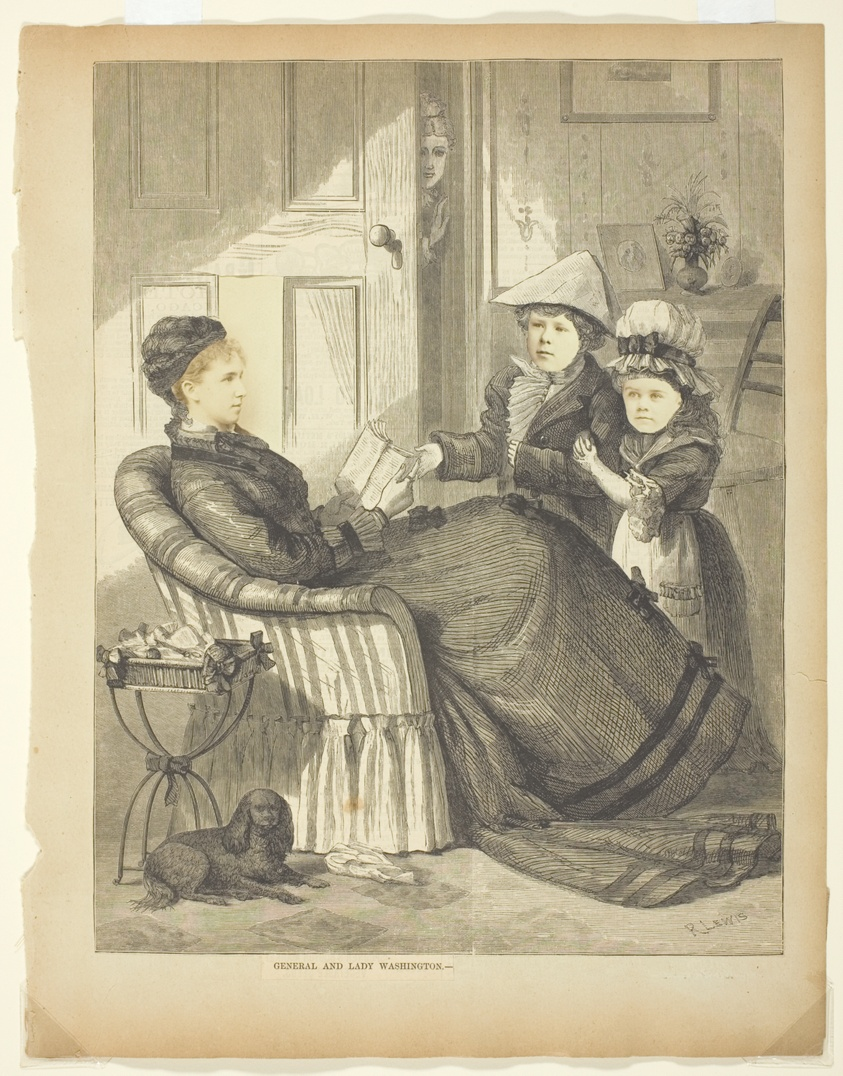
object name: Photograph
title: General and Mrs. George Washington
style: 19th century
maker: Artist unknown; American, 19th century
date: 19th century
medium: Photocollage (albumen prints with woodcut)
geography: United States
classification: mixed media/collage; photography; photograph